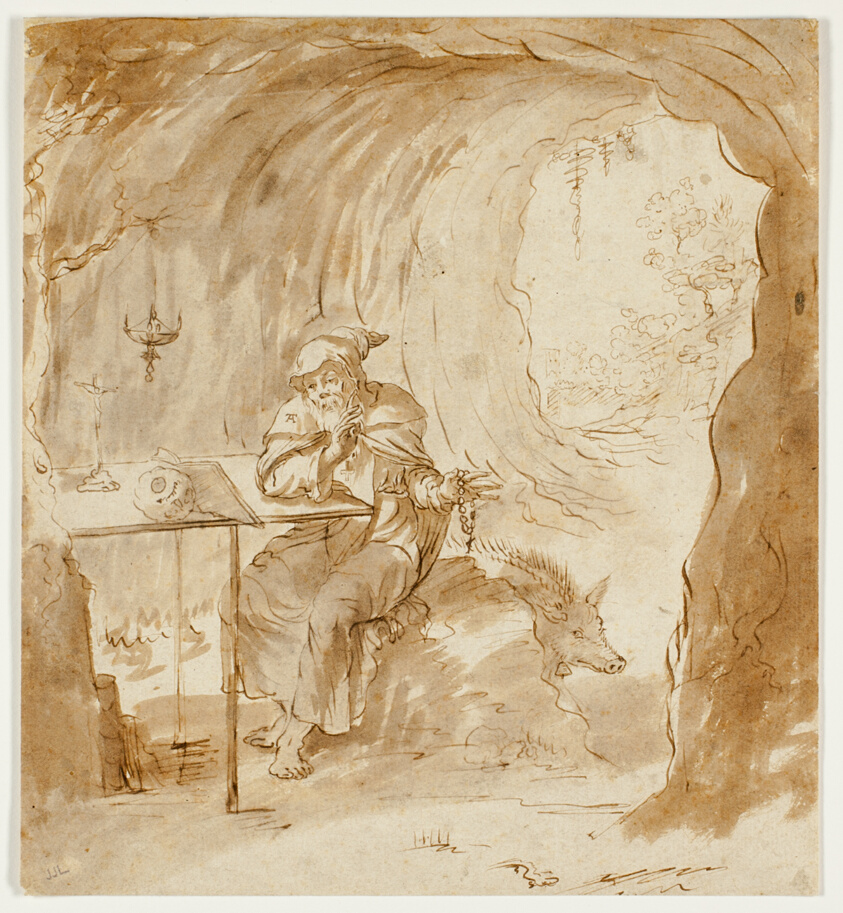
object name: Drawing and Watercolor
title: St. Anthony with the Boar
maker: formerly attributed to Antonio Tempesta; Italian, 1555-1630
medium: Pen and brown ink with brush and brown wash, on ivory laid paper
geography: Italy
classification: pen and ink drawings; drawings (visual works); prints and drawing